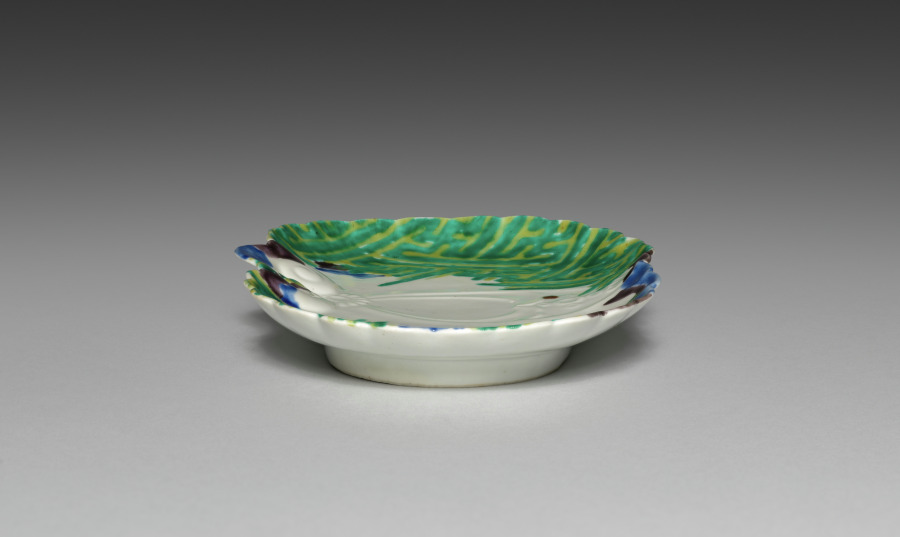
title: Ginkgo Leaf-Shaped Small Dish (Kozara) with Stylized Key-Fret Design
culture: Japan, Edo period (1615–1868)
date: mid-1600s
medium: Porcelain with molding and overglaze color enamel (Hizen ware, Matsugatani kilns, Nabeshima type)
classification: Ceramic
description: This dish combines a precisely molded shape with a freehand design in overglaze color enamels.